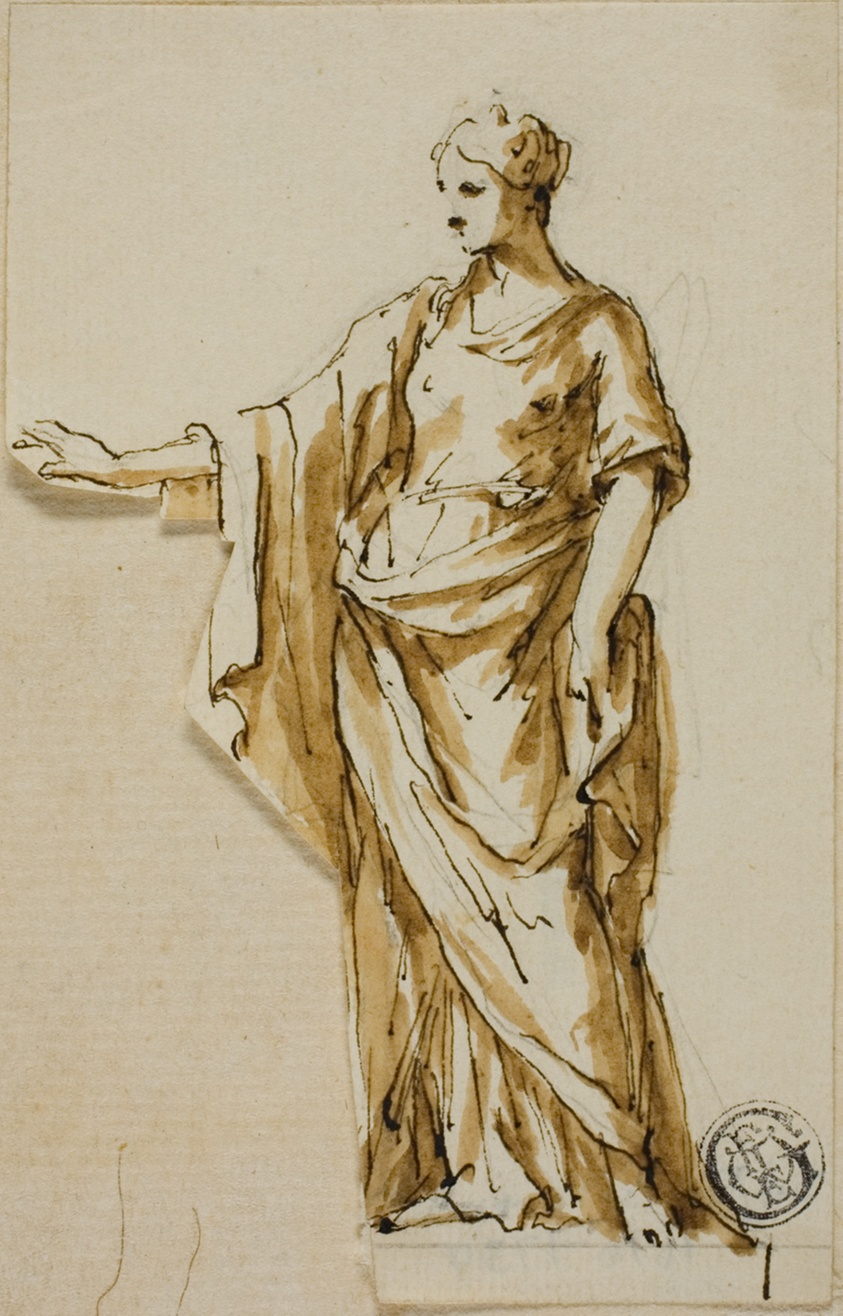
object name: Drawing and Watercolor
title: Standing Female Figure with Right Arm Raised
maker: John Michael Rysbrack (Flemish, 1693-1770)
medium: Pen and brown ink, with brush and brown wash, over graphite, on cream laid paper, tipped onto ivory laid paper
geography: Flanders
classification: pen and ink drawings; drawings (visual works); prints and drawing